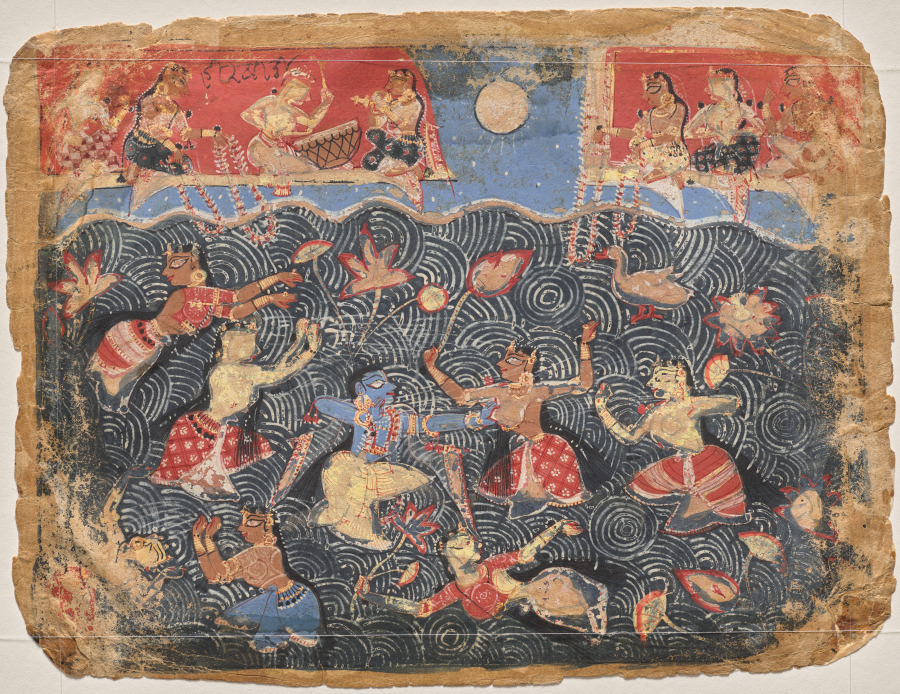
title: Krishna sporting with the gopis in the Jumna River, from a Bhagavata Purana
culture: Northern India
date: c. 1525–40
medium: Gum tempera and ink on paper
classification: Painting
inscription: [[recto, upper left corner]] Hlrabal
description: Abstract concentric circles depict water churned up by the gopis, or cowherd women, who are swimming and playing with joy and abandon. In their midst, the blue-skinned Krishna reaches for a gopi’s breast. Their love play is celebrated by celestial beings in the sky who offer flower garlands and beat on a drum. Every figure’s face is shown in profile—a hallmark of Indian painting of the early 1500s perpetuated by artists wishing to emphasize Indian rather than Persian depictions of the human form.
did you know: This page is from one of the earliest surviving illustrated Hindu manuscripts on the life of Krishna, an incarnation of Vishnu.